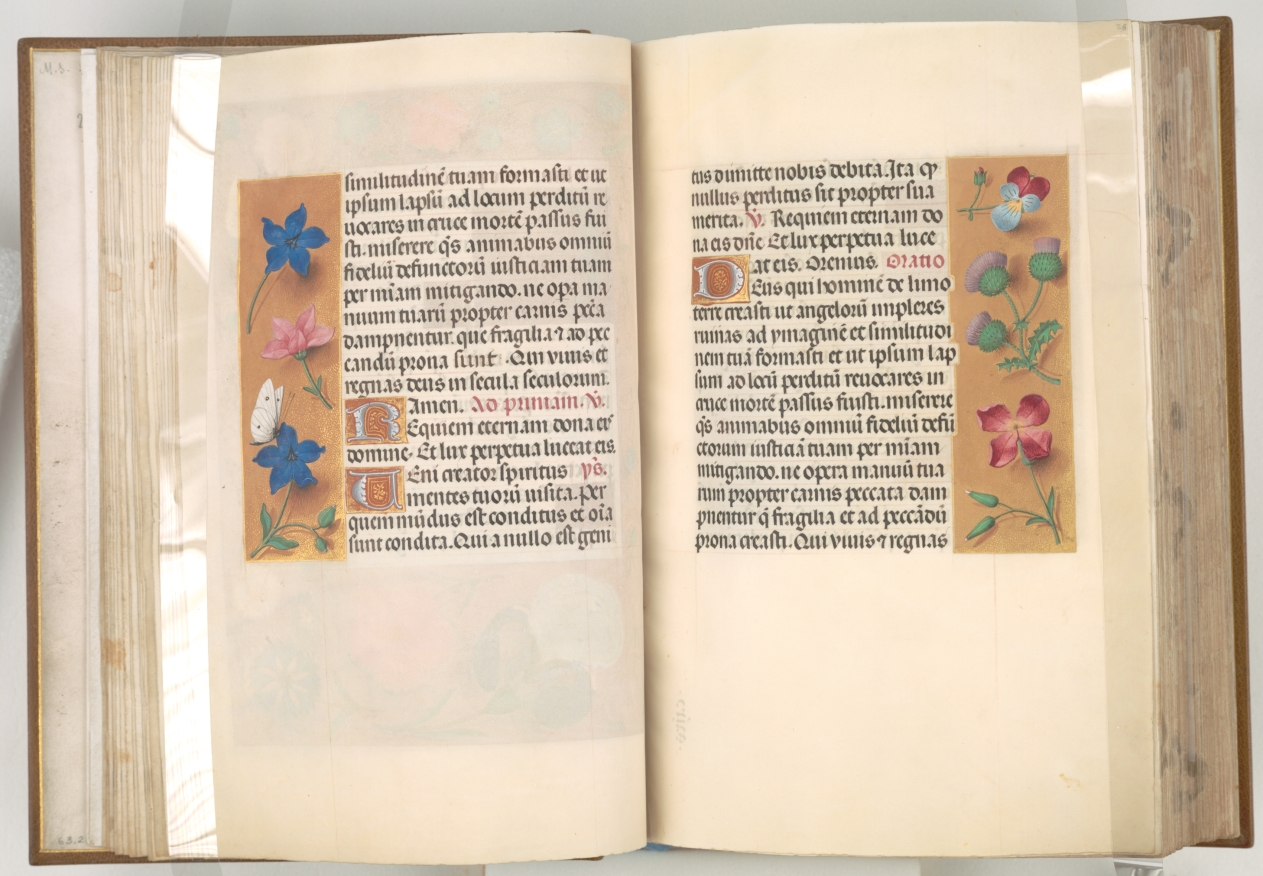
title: Hours of Queen Isabella the Catholic, Queen of Spain: Fol. 26r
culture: Flanders, Ghent and Bruges, late 15th century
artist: Master of the First Prayerbook of Maximillian (Flemish, c. 1444–1519)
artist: and Associates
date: c. 1500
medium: ink, tempera, and gold on vellum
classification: Bound Volume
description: A great lover of Flemish art, Queen Isabella treasured her many devotional books. This deluxe manuscript was created for her private devotions by highly organized and distinctly talented manuscript painters active in Ghent and Bruges. The Ghent-Bruges school represents the culmination of Flemish book painting, whose main features were the use of rich colors, illusionistic effects, a love of landscape, and a strong sense of visual narrative. Manuscripts produced by this circle of artists are renowned for their border decoration featuring a rich variety of realistically painted flowers, scrolling acanthus leaves, birds, and butterflies.